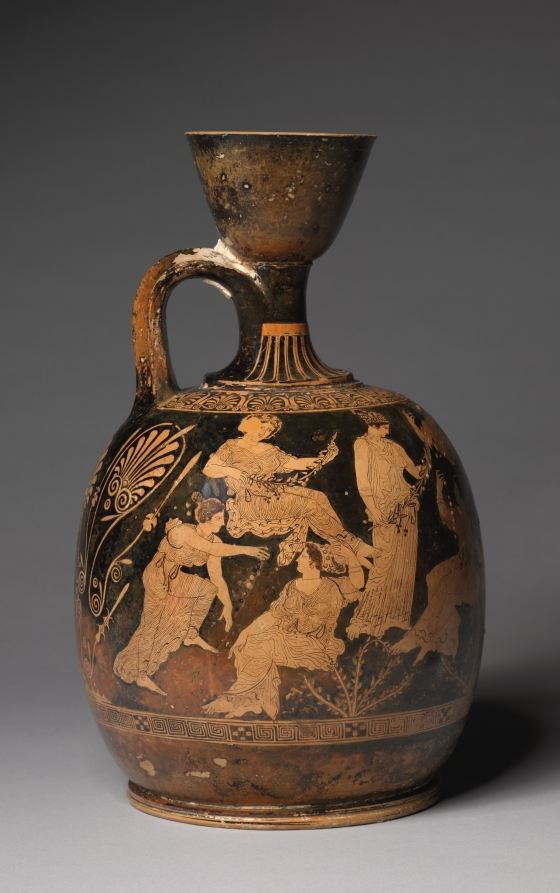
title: Red-Figure Squat Lekythos (Oil Vessel): Birth of Erichthonios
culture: Greek, Attic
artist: attributed to Meidias Painter (Greek, Attic, active c. 420–400 BCE)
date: c. 420–410 BCE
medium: ceramic, with gilding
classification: Ceramic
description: The central group on this vase shows the seated earth goddess Ge (also known as Gaia) handing her baby, Erichthonios, to Athena. Conceived from the seed of Hephaistos, Erichthonios would go on to become a king of Athens, and the story of his birth became popular in Athenian art of the fifth century BC. Other representations include Hephaistos as well as Kekrops, the mythical first king of Athens, sometimes together with Zeus and other deities. But this one includes only female onlookers—likely the three daughters of Kekrops watching from above, with Aphrodite and several abstract personifications such as Peitho (Persuasion) and Eudaimonia (Happiness) standing and seated nearby.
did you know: A lead rivet sits at the junction of handle and neck, probably an ancient repair.